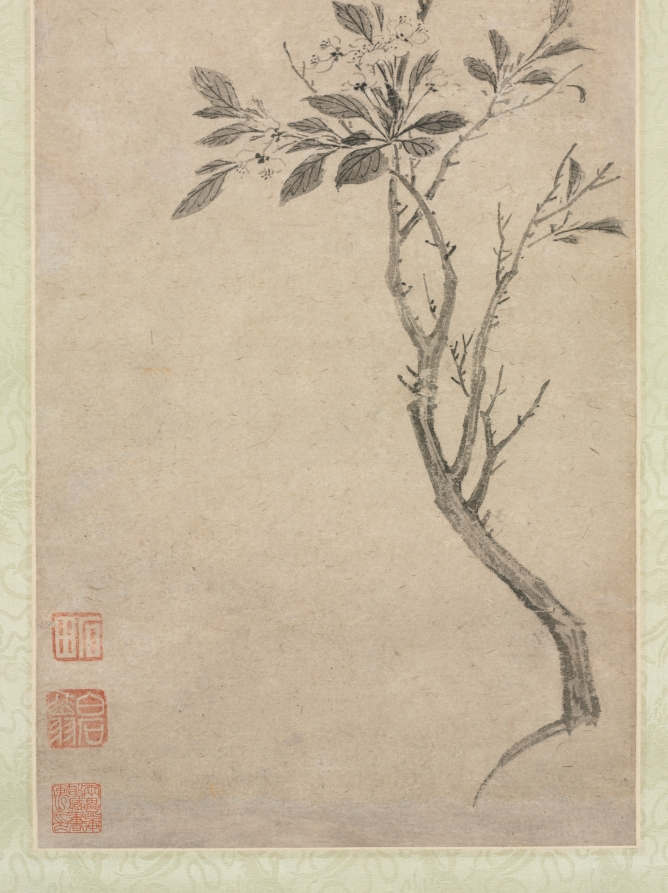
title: Flowering Crab Apple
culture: China, Ming dynasty (1368–1644)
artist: Shen Zhou (Chinese, 1427–1509)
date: 1500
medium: hanging scroll, ink on paper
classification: Painting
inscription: 粧[粉]合胭脂作曉粧，富於顔色吝於香。 東風不肯全分付，相對梅花各斷腸。 弘治庚申春日, 在雙蛾僧舍見海棠盛開, 適值陸汝器在坐索圖, 此繪以寄興。 長洲沈周 [印]啟南; 石田; 白石翁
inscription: 1 additional seal of Wu Yun 吳雲 (1811-1883).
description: Shen Zhou painted a broken branch (zhezhi 折枝) of crab apple, a fragment of nature rather than the full plant in its natural context. Shen uses calligraphic outlines in pure ink to depict the flower petals. The swift yet precise brushstrokes together with the slight S-shaped branch convey vitality. The inscription is a poem written by the artist, commenting on the lovely color and melancholic aura of the crab apple blossom. Shen Zhou is the founder of the Wu School, a group of scholars and officials active around Suzhou in eastern China, known for practicing painting and calligraphy in a refined and elegant style.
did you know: Shen Zhou painted this is an informal and rapidly done presentation picture when he was 74 years old.